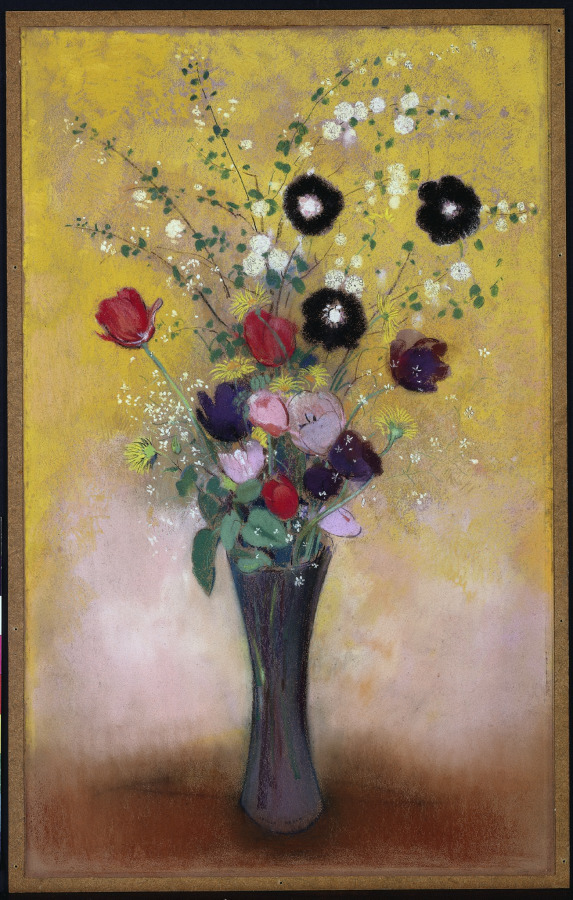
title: Vase of Flowers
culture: France, 20th century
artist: Odilon Redon (French, 1840–1916)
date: 1916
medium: pastel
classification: Drawing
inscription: signed on base of flower: ODILON REDON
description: Inspired by Cleveland’s groundbreaking acquisitions of Odilon Redon’s artworks during the 1920s, local philanthropist and collector Leonard C. Hanna Jr. purchased this luminous pastel of a floral still life in 1937. Hanna acquired it from Jacques Seligmann, a dealer based in New York City and Paris who was fundamental in bringing 19th-century French art to American audiences. In 1939, Hanna loaned the pastel to the New York World’s Fair, where it represented Redon’s work. Those who saw it there were attracted to the vivid color and timeless subject, which preoccupied the artist at the end of his life.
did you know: Redon was inspired to depict flowers after meeting the botanist Armand Clavaud, a cataloguer of plant species in the artist's native region of Bordeaux